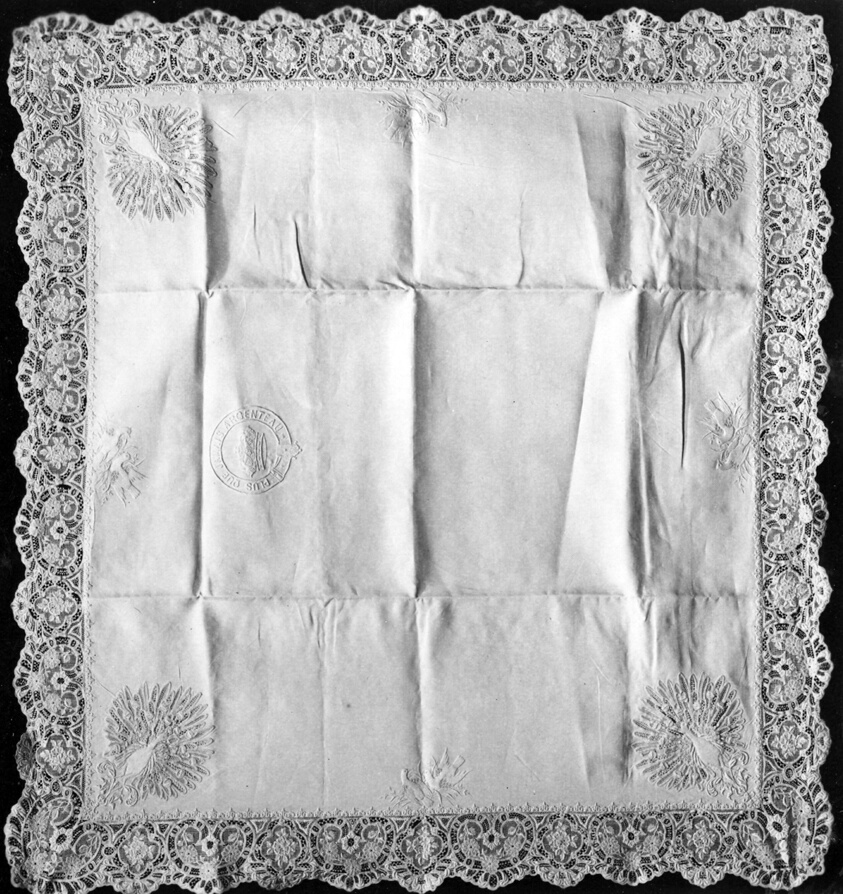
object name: Textile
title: Pillow Cover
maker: Switzerland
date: 1875/1900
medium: Linen, plain weave, with embroidered border, in satin, eyelet, seed, buttonhole, drawnwork, and lace stitches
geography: Switzerland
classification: textile; needlework (visual works)